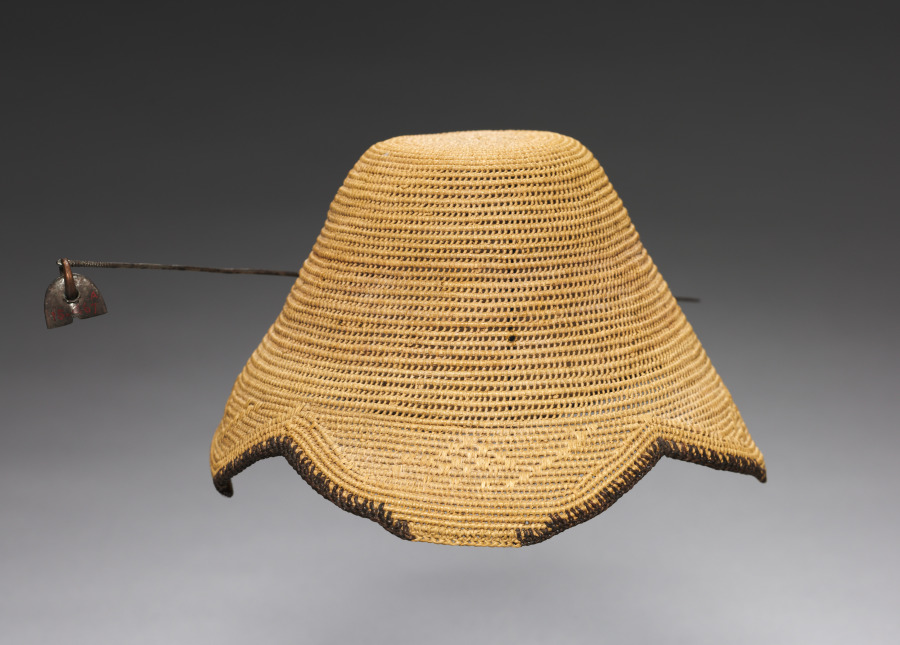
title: Hat (laket)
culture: Africa, Central Africa, Democratic Republic of the Congo, Kuba-style maker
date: early 1900s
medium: Raffia and dye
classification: Garment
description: Titled Kuba men and prominent women wear the laket, a small ornate dome-shaped hat. An essential fashion item of adult men in good social standing, it focuses special attention on the head as a significant marker of individual identity, ethnic affiliation, status, and role in society. This prestige object is secured on the crown of the head with a nine-and-a-half-inch metal pin that pierces through the hat onto a clump of hair. This laket is made from raffia palm fiber coiled into threads and woven in different patterns. There are two examples of the laket: the plain type with the flat top, and the more elaborate type called the laket mishiing.